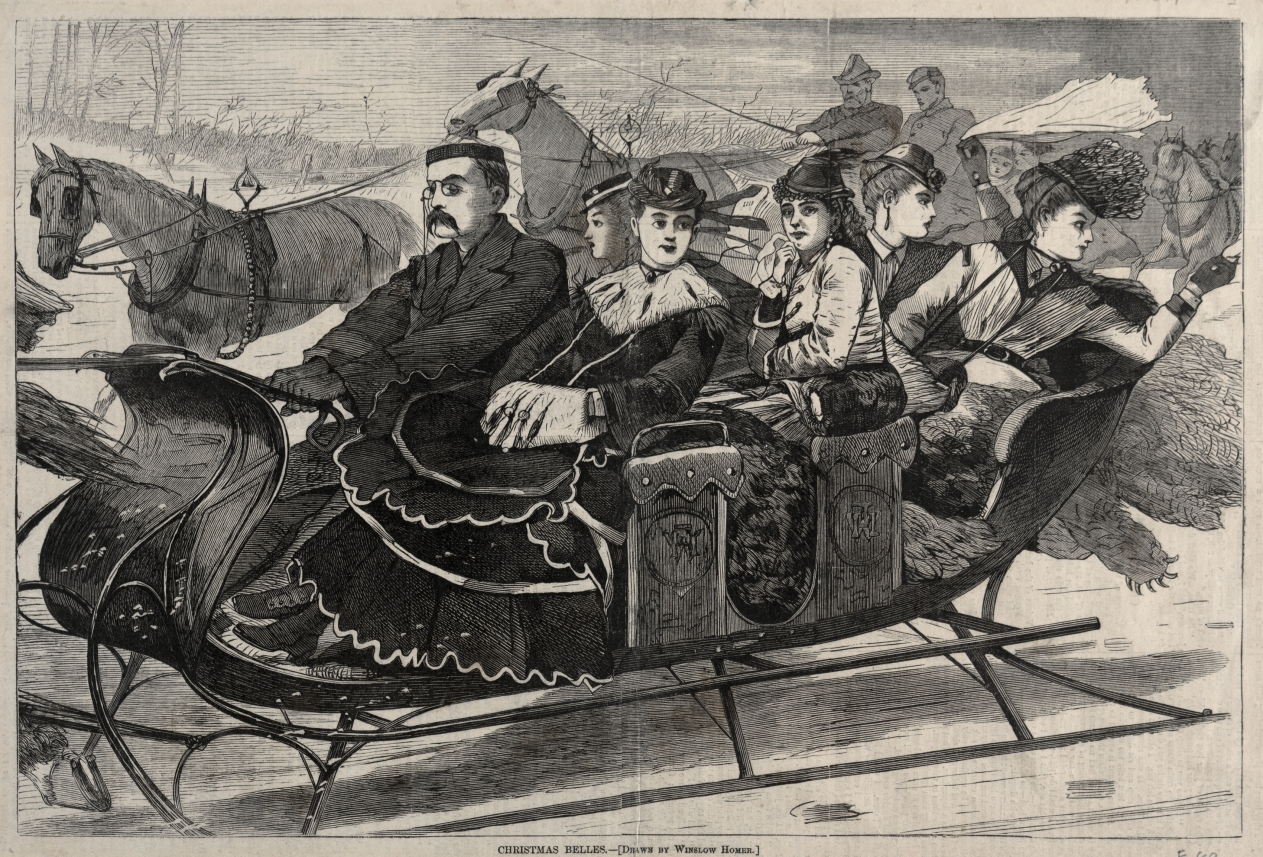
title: Christmas Belles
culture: America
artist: Winslow Homer (American, 1836–1910)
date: 1869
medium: wood engraving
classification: Print